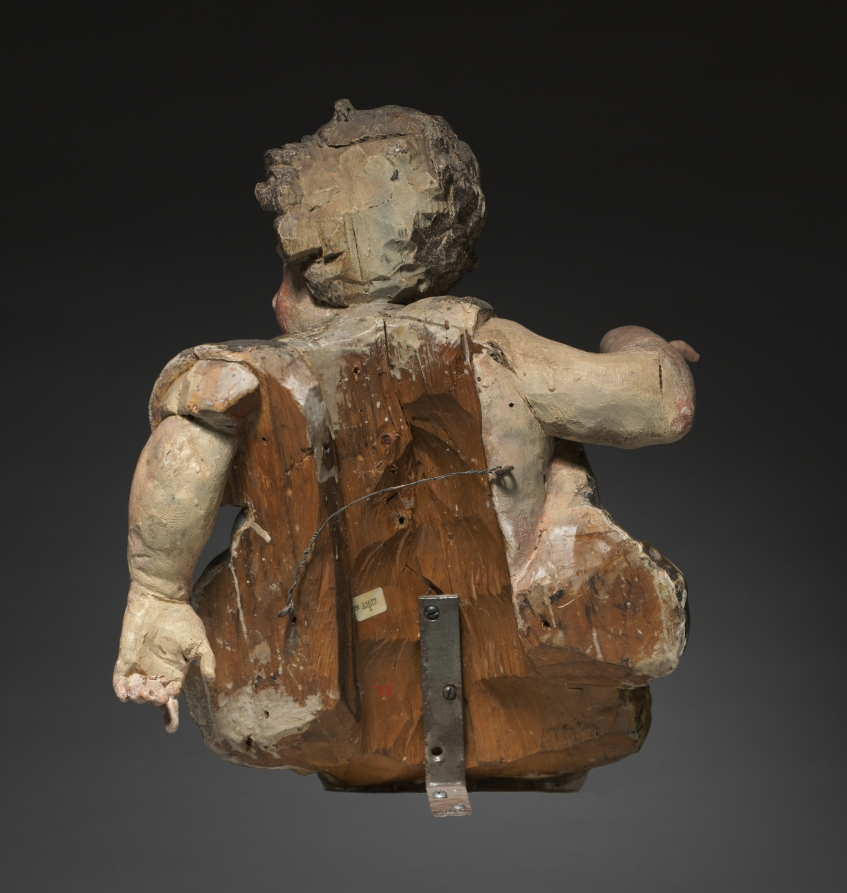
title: Putto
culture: Germany, near Bamberg, 18th century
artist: Ferdinand Tietz (Austrian, 1708–1777)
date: mid-1700s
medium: painted and gilded wood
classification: Sculpture